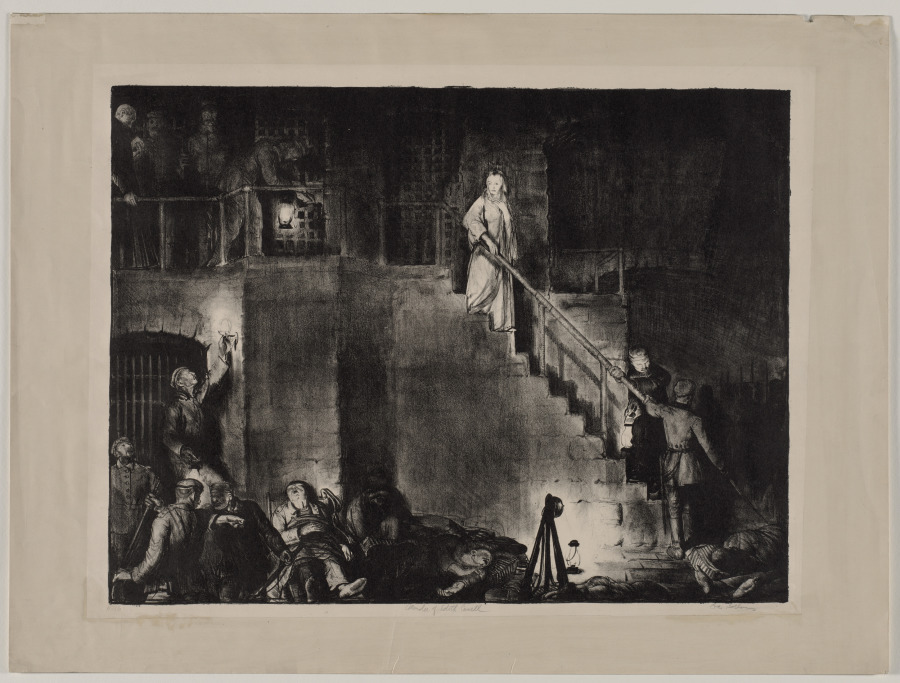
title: Murder of Edith Cavell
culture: America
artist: George Bellows (American, 1882–1925)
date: 1918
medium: lithograph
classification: Print